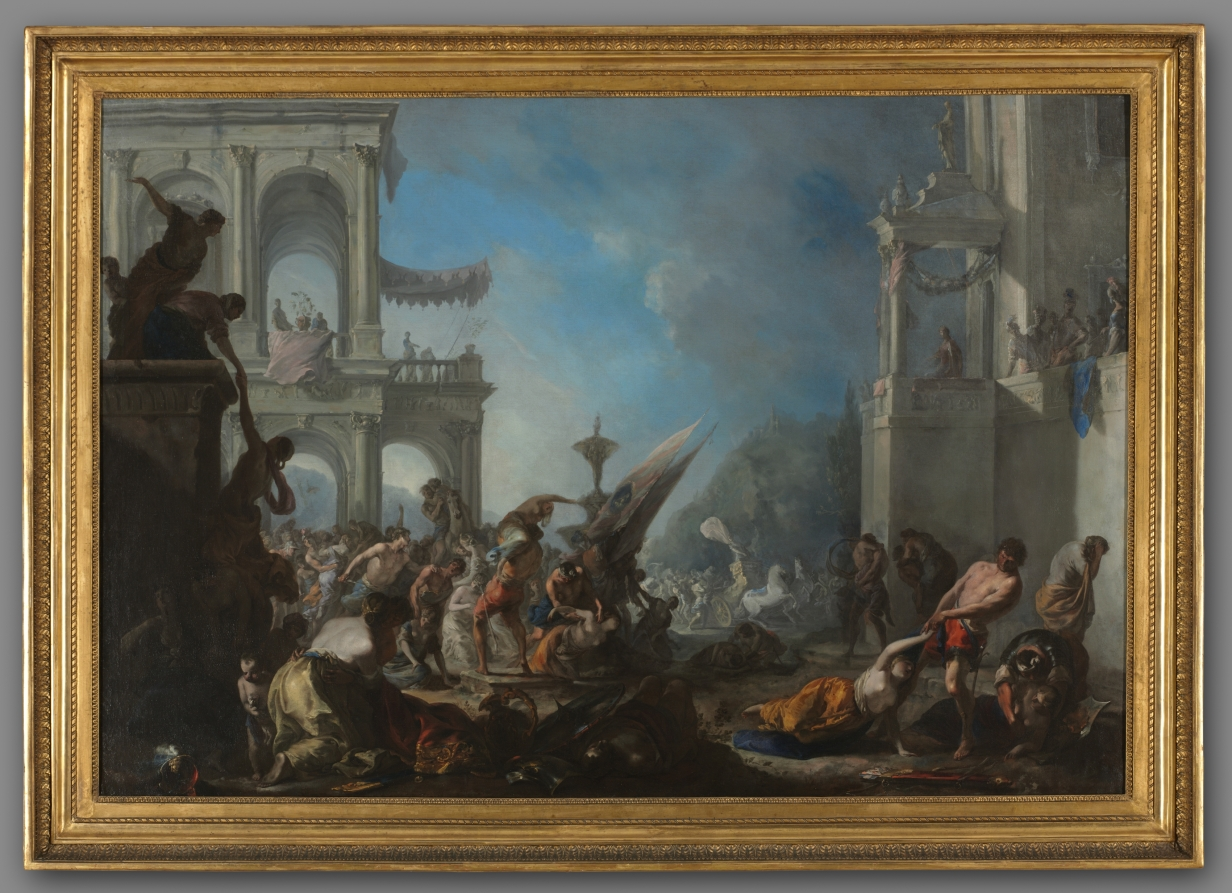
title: Abduction of the Sabine Women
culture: Germany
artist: Johann Heinrich Schönfeld (German, 1609–1684)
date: c. 1640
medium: oil on canvas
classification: Painting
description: Shortly after Rome was founded, the Romans abducted the women of the neighboring Sabines to be their wives. During the ensuing war, the Sabine women intervened, making peace between the two sides. Painted in Naples, this canvas seems to be the last of four versions of the subject painted by Johann Schönfeld (two in the Hermitage, St. Petersburg, another in a private collection).